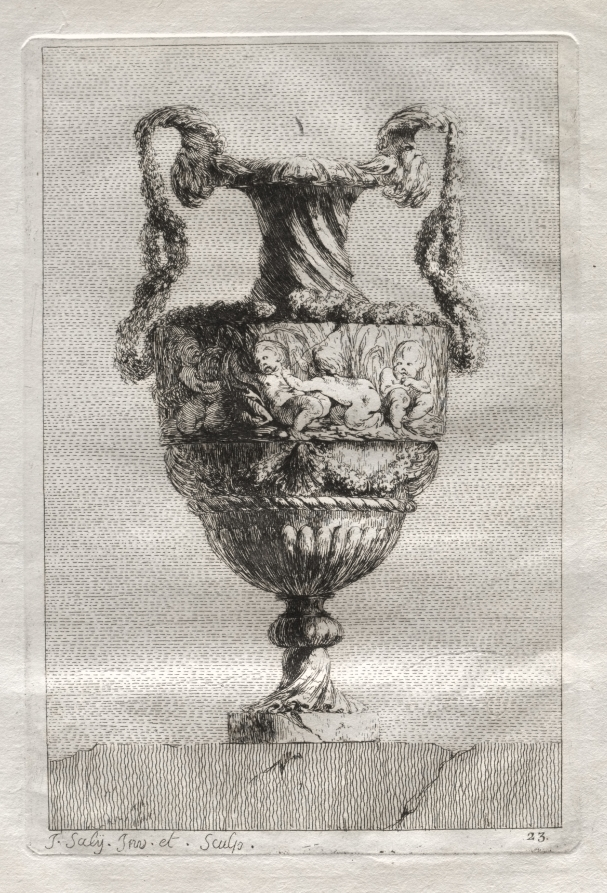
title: Suite of Vases: Plate 23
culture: France, 18th century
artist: Jacques François Saly (French, 1717–1776)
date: 1746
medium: etching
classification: Print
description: Designing ornamental vases or urns was particularly popular during the mid-18th century since the only limit to the possibilities was the imagination of the artist. Saly, a sculptor by training, was a student at the French Academy in Rome from 1740 to 1746, at which time he published a set of 30 etchings. Saly began with basic antique vase forms but deviated from classical ornament to use a rich variety of fantastic creatures for embellishment.